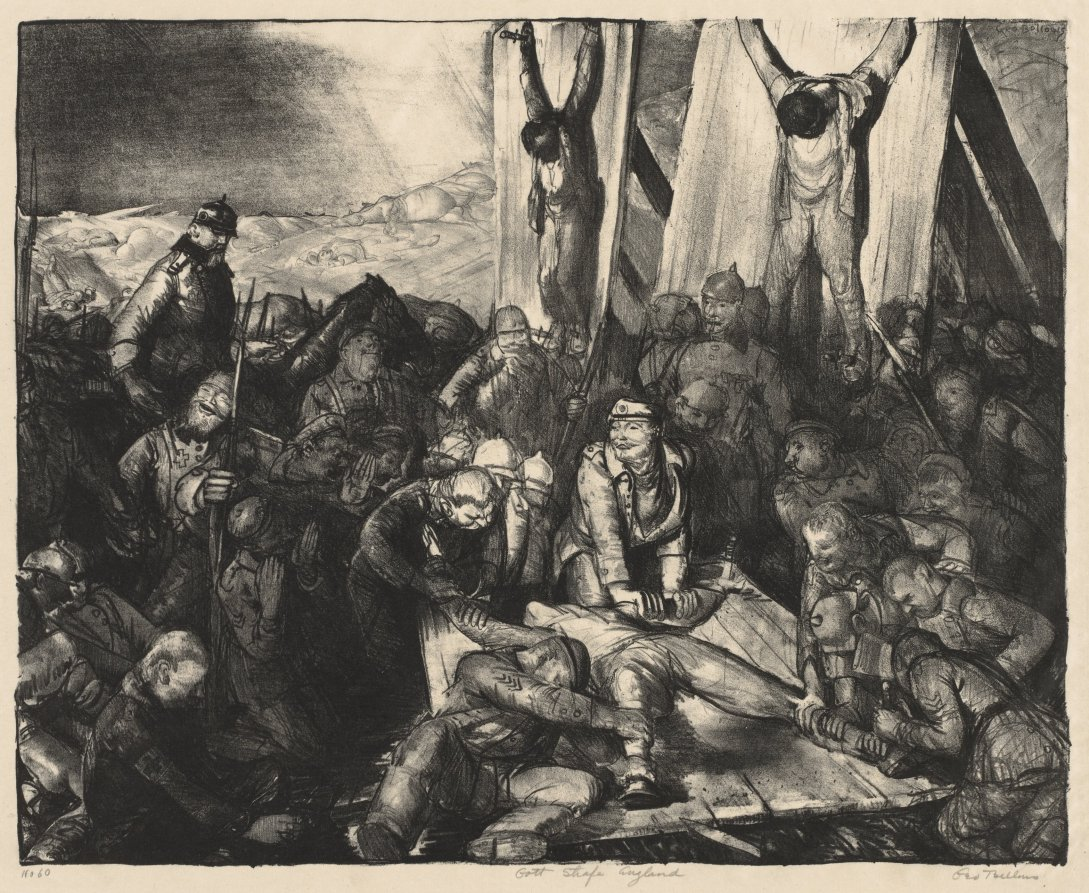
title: War Series: Gott Strafe, England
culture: America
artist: George Bellows (American, 1882–1925)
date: 1918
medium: lithograph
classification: Print